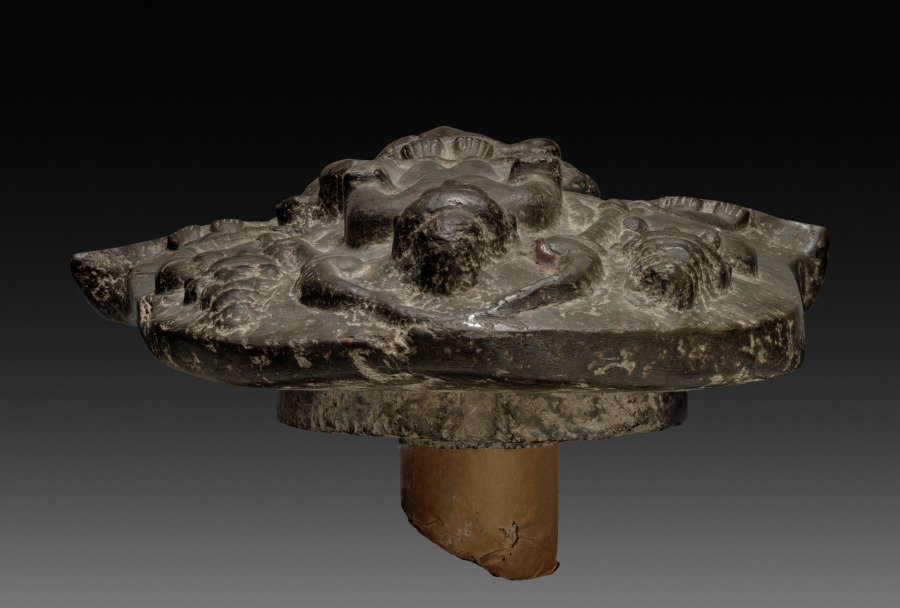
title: Bracket with Buddha and a Pair of Acolytes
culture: Thailand, Mon-Dvaravati style, probably from Nagara Pathama, 8th-9th Century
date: 700s–800s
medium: gray schist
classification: Sculpture